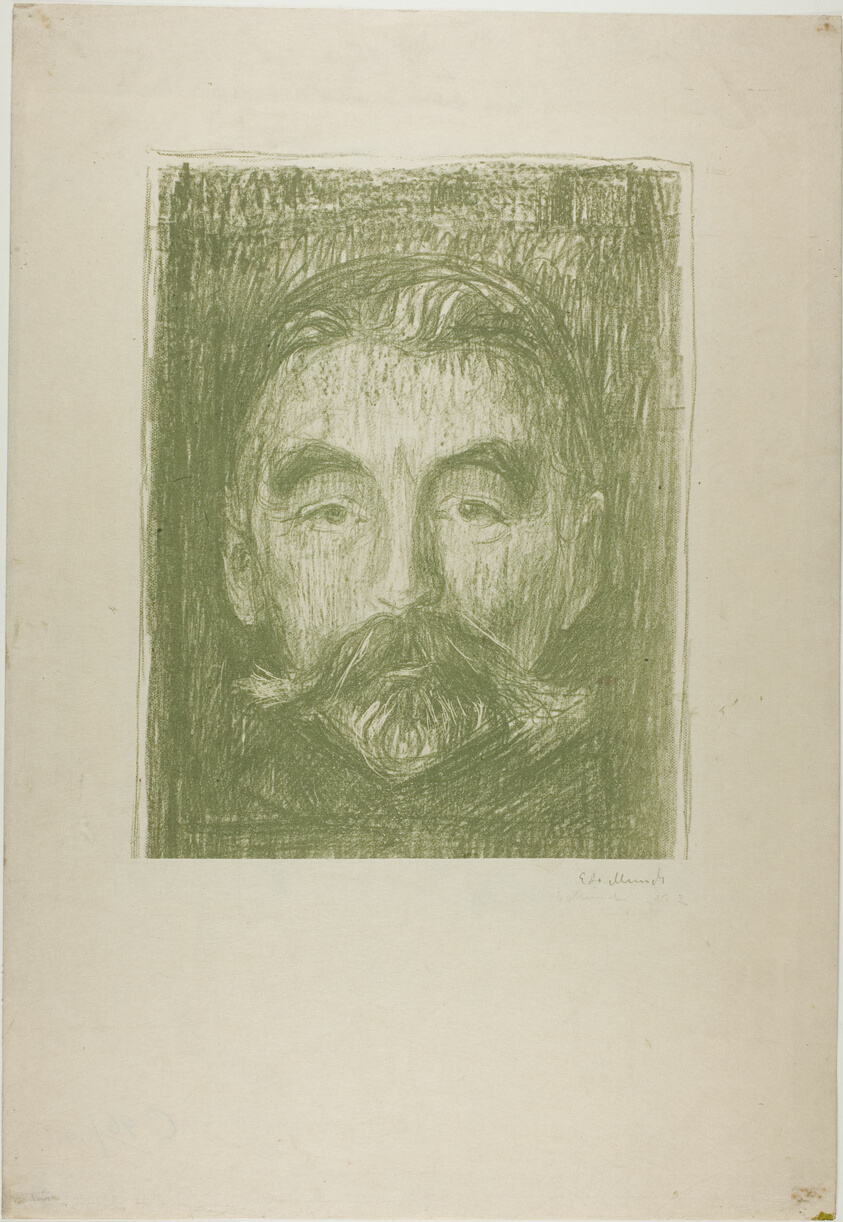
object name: Print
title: Stéphane Mallarmé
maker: Edvard Munch (Norwegian, 1863-1944); printed by Auguste Clot (French, 1858-1936)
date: 1897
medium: Transfer lithograph with crayon and scraping in green on cream Japanese paper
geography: Norway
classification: lithograph; print; prints and drawing